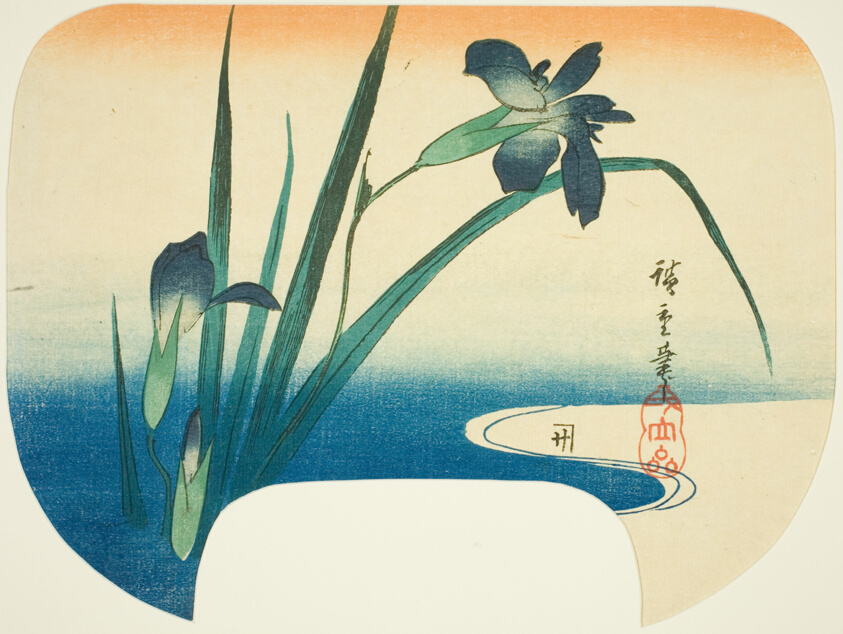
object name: Print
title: Iris and stream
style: Japanese (culture or style)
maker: Utagawa Hiroshige 歌川 広重; Japanese, 1797-1858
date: c. 1830/44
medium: Color woodblock print; uchiwa-e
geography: Japan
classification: woodblock print; print; asian art